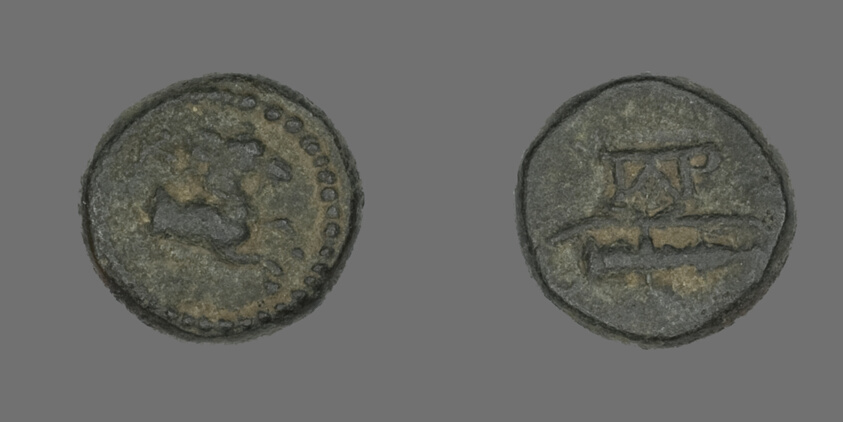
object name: Coin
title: Coin Depicting a Horse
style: greek, ancient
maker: Greek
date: after 190 BCE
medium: Bronze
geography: Ancient Greece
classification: coin; ancient art